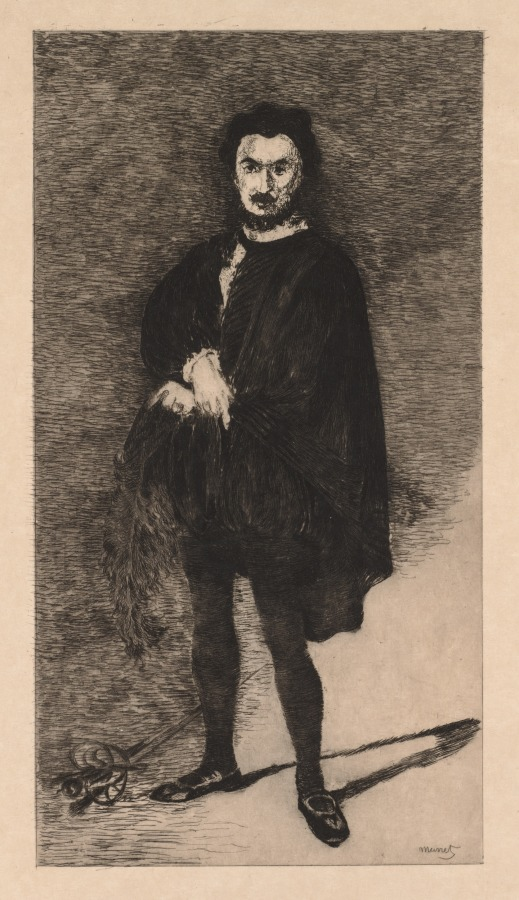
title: The Tragic Actor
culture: France, 19th century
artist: Édouard Manet (French, 1832–1883)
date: 1866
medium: etching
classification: Print